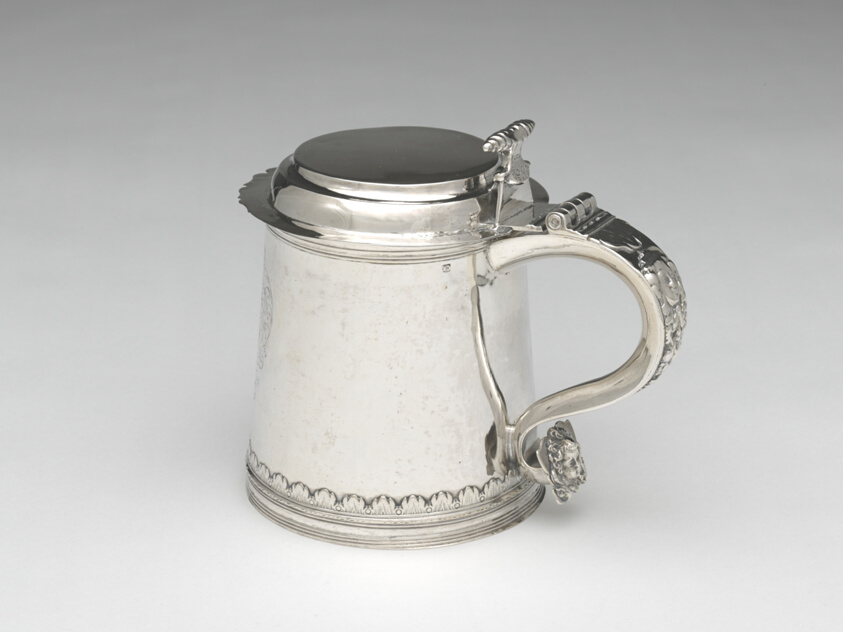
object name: Metalwork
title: Tankard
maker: Cornelius Kierstede; American, 1674–1757; New York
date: 1700–20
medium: Silver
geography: New York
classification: drinking vessel; silver; american decorative arts; american arts; decorative arts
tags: dining, drinking